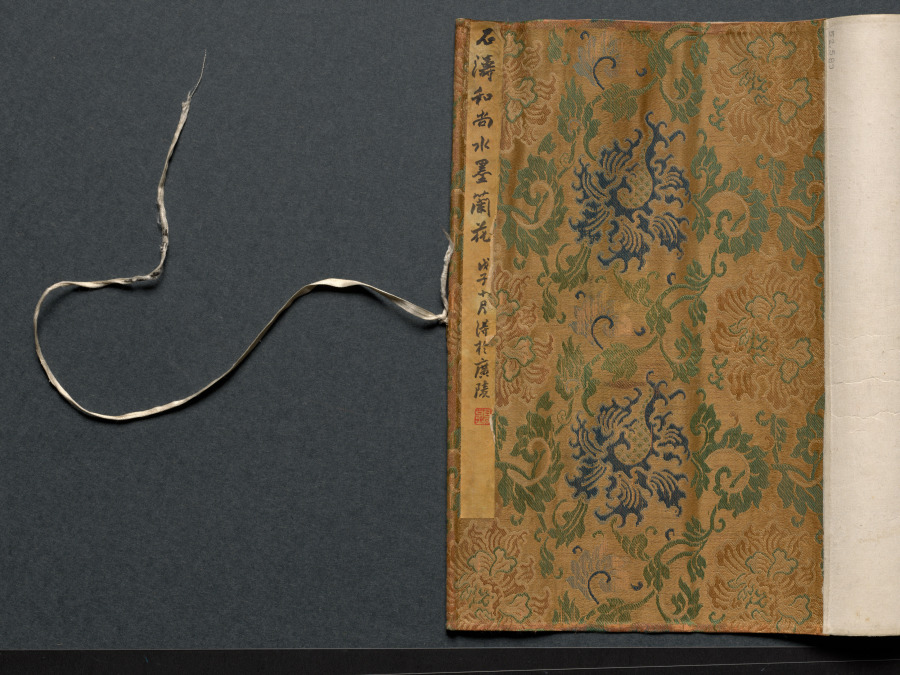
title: Rocks, Orchid, and Bamboo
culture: China, Qing dynasty (1644-1911)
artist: Shitao (Chinese, 1642–1707)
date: 1662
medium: handscroll; ink on paper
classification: Painting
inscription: Title colophon in four characters with signature and two seals on gold-flecked paper.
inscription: Artist's signature, inscription (with date of 1662), five seals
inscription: Colophon with two seals.